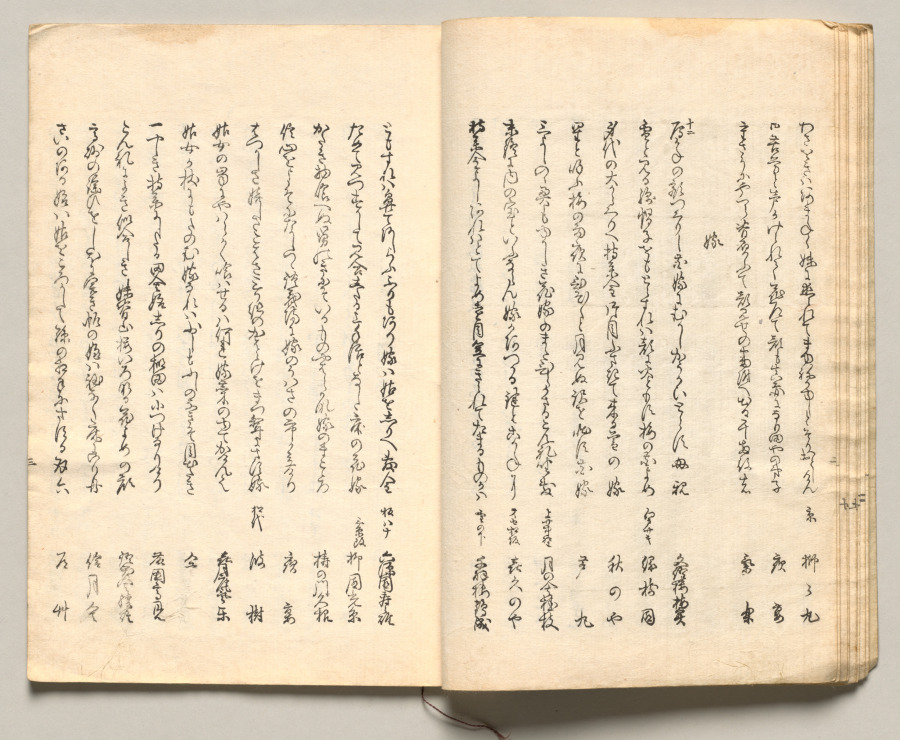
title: Spread Ten from Volume Five of People of Japan in Light Verse (Kyōka)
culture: Japan, Edo period (1615–1868)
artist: Utagawa Hiroshige (Japanese, 1797–1858)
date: 1857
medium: Woodblock-printed book; ink and color on paper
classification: Bound Volume